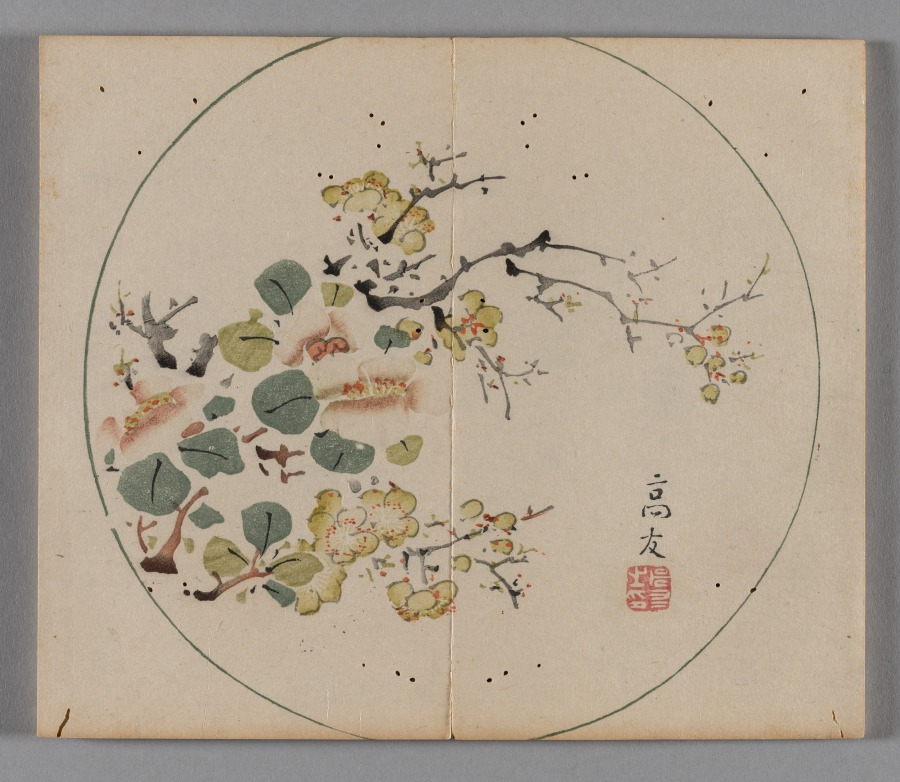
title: Ten Bamboo Studio Collection of Calligraphy and Painting: Round Fans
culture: China, Qing dynasty (1644-1911)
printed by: Hu Zhengyan (Chinese, c. 1584–1674)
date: 1633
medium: Woodblock-printed book; ink and colors on paper; first edition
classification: Print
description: Color printing reached a level of perfection in the early 1600s, as seen in this Ten Bamboo Studio Collection of Calligraphy and Painting and the Mustard Seed Garden Manual of Painting (printed 1679 and 1701). The painterly quality, precision in registering (aligning) the woodblocks, and harmonious colors made them the most successful color print editions in Chinese history. Both editions were printed and compiled in Nanjing, spread nationwide, and had a great impact on the arts in Japan and Korea.